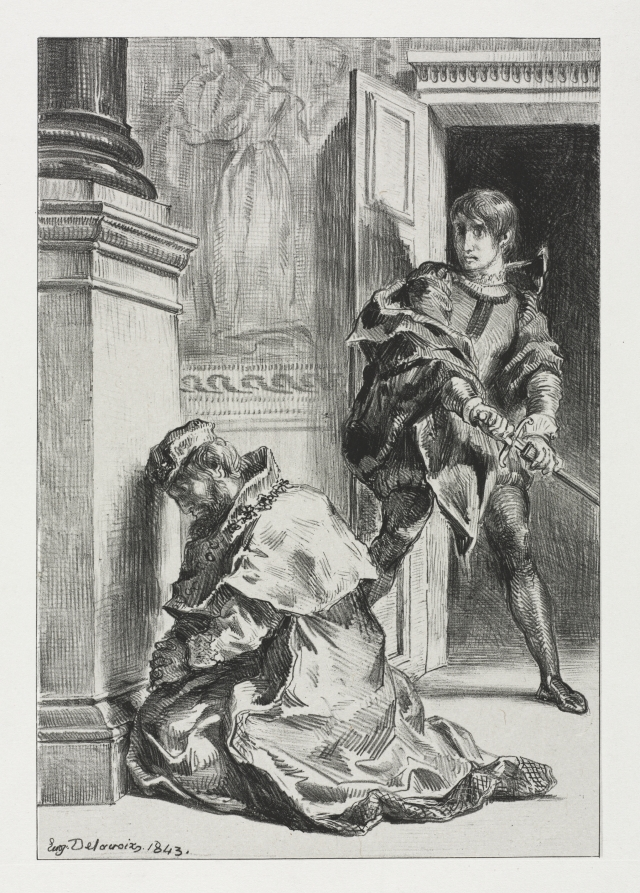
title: Hamlet: Hamlet Attempts to Kill the King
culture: France, 19th century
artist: Eugène Delacroix (French, 1798–1863)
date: 1843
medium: lithograph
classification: Print